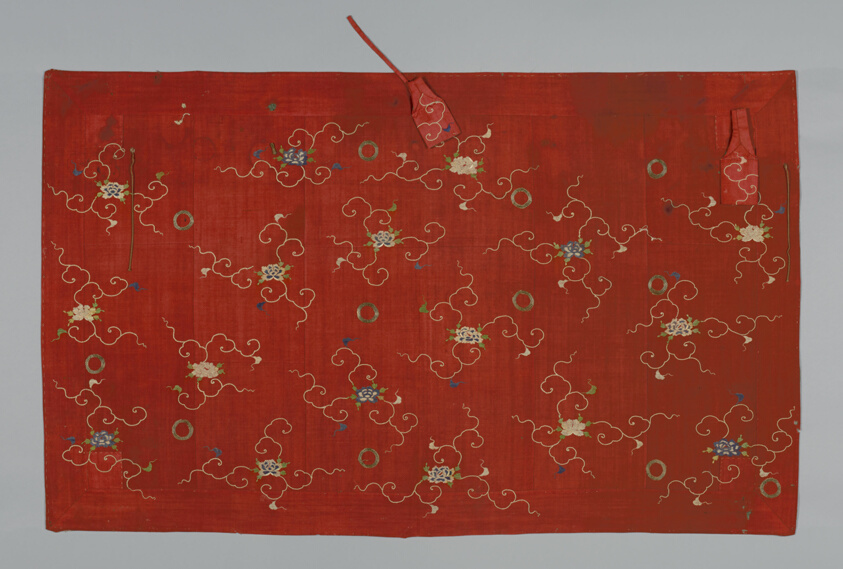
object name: Textile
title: Kesa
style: late edo, meiji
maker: Japan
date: late Edo period (1789–1868)/ Meiji period (1868–1912), 1850/70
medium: Wool, plain weave; embroidered with silk and gold-leaf-on-lacquered-paper strip wrapped cotton in satin stitches; laidwork and couching; lining: silk, plain weave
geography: Japan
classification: textile; needlework (visual works); weaving; liturgical - buddhist